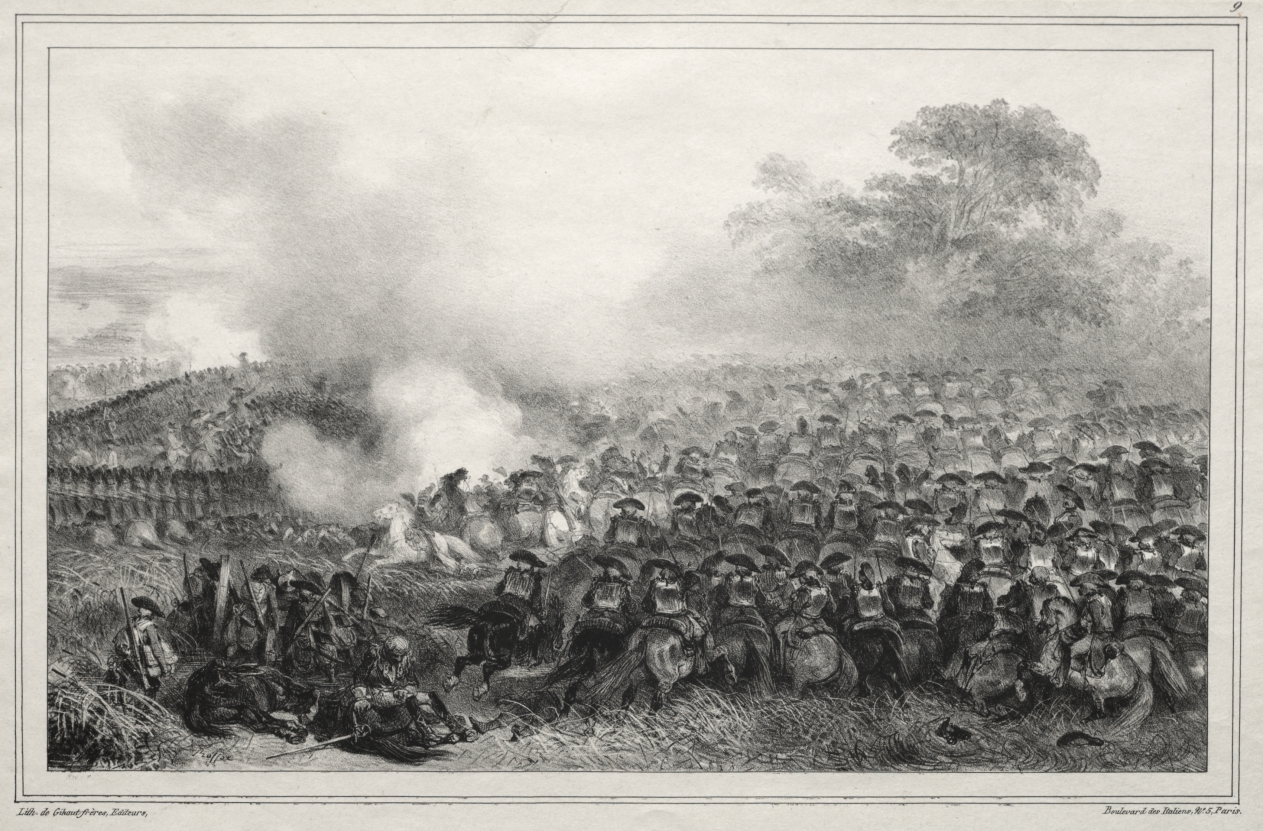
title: Album for 1835: Carré enfoncé...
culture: France, 19th century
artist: Auguste Raffet (French, 1804–1860)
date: 1835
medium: lithograph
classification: Print